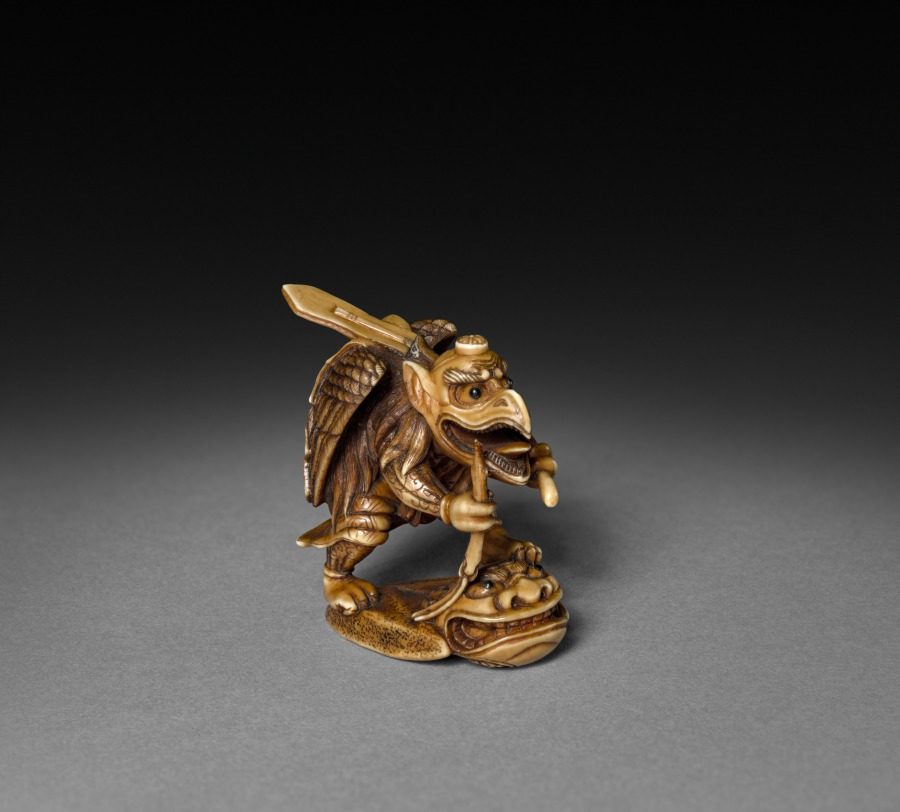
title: Tengu Travelling as a Priest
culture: Japan, Edo period (1615–1868)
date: early to mid-1800s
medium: ivory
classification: Netsuke